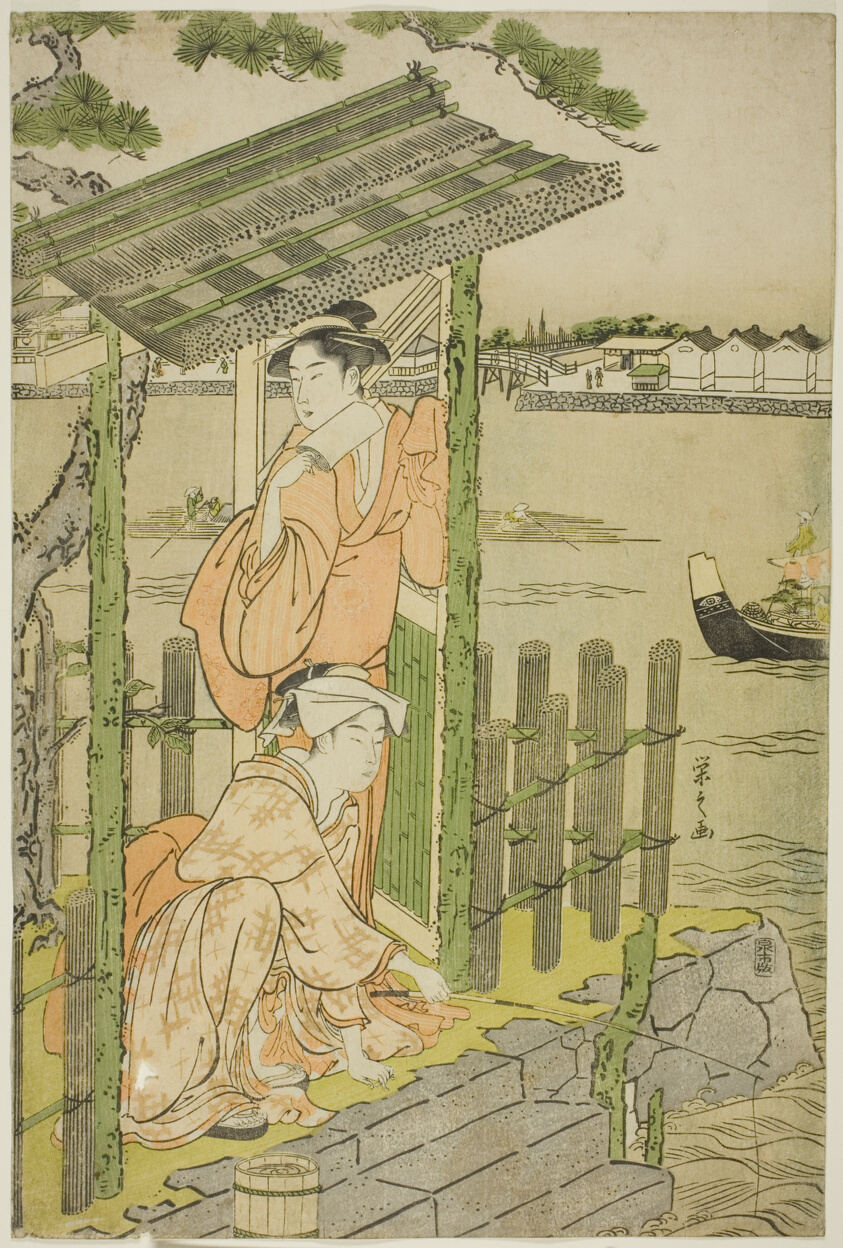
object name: Print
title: Gathering at a Teahouse on the Bank of the Sumida River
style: Japanese (culture or style)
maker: Chobunsai Eishi; Japanese, 1756-1829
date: c. 1788/90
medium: Color woodblock print; right sheet of oban diptych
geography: Japan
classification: woodblock print; print; asian art